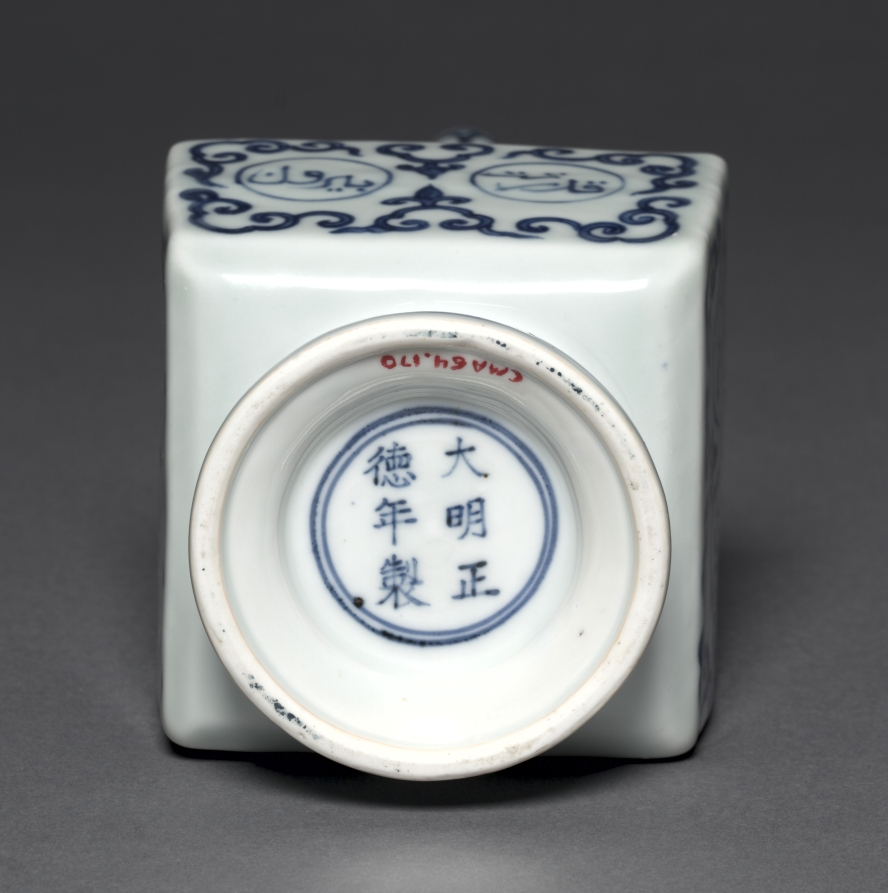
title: Arrow Vase with Persian Inscriptions and Floral Scrolls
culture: China, Jiangxi province, Jingdezhen kilns, Ming dynasty (1368-1644), Zhengde mark and reign (1505-1521)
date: 1506–21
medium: porcelain with underglaze cobalt blue decoration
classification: Ceramic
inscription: The two Persian inscriptions on the neck freely translated read 'Oh Beautiful! Oh Powerful'! Those around the body read 'None knows the extent and limits of Thy power and Majesty.'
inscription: 大明正德年製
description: Chinese potters in the 1500s integrated foreign motifs, shapes, and ideas in order to cater to changing tastes and new customers in an increasingly global world.